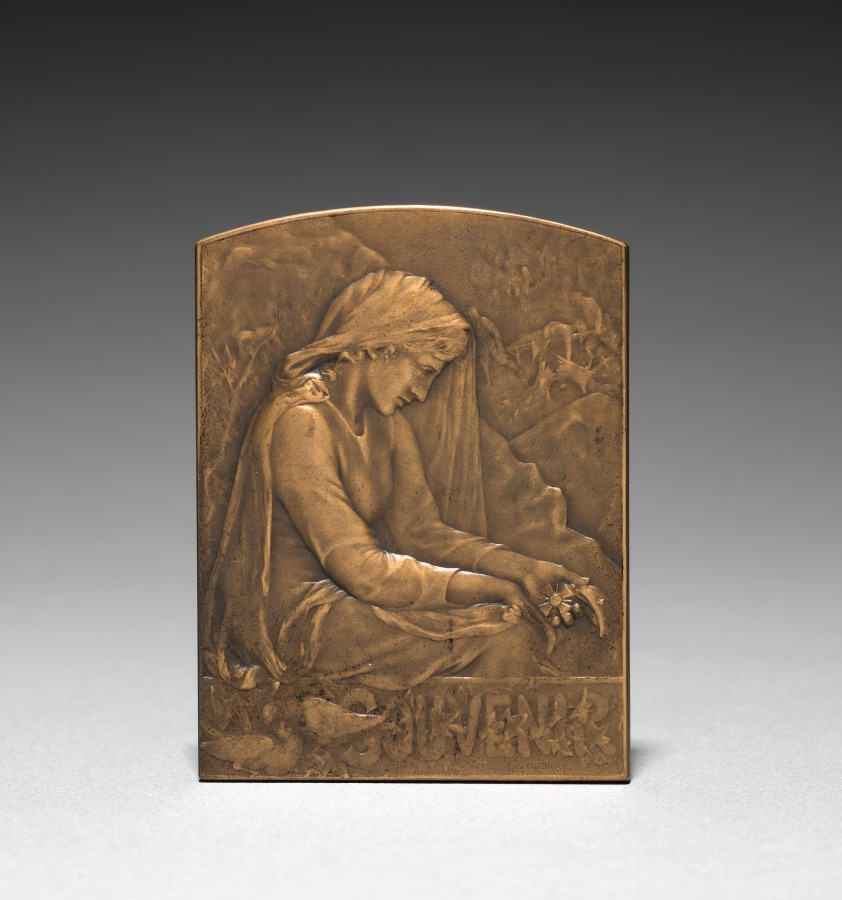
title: Medallion (obverse)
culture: France, 19th century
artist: Marie Alexandre Lucien Coudray (French, 1864–1932)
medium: bronze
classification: Metalwork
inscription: "SOUVENIR"; signed: "L. Coudray."